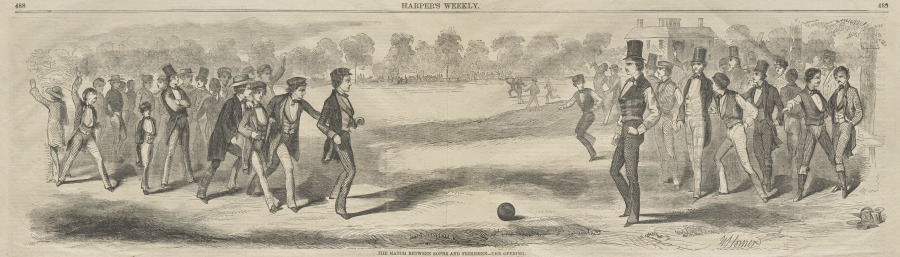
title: The Match between the Sophs and Freshmen - The Opening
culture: America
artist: Winslow Homer (American, 1836–1910)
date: 1857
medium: wood engraving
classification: Print